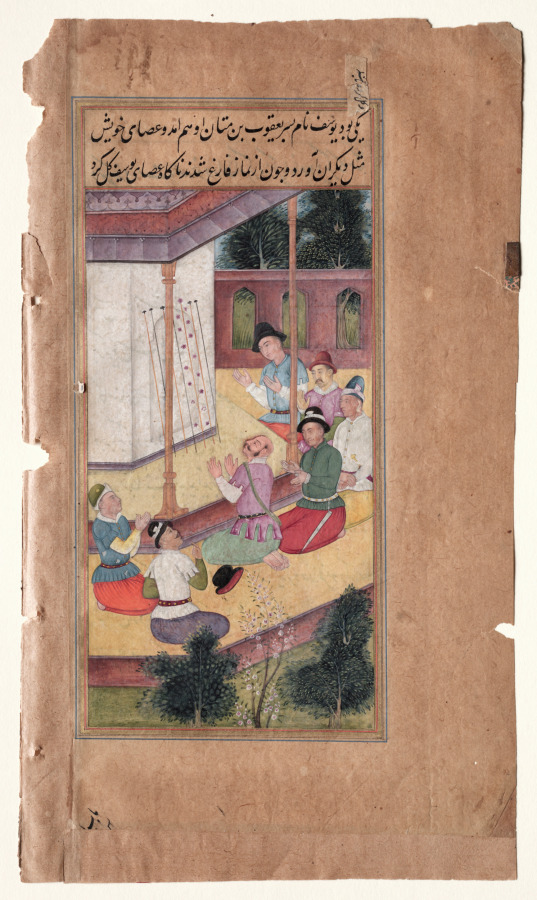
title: The Flowering of Joseph’s Rod (folio 11 verso), from a Mirror of Holiness (Mir’at al-quds) of Father Jerome Xavier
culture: Mughal India, Allahabad, made for Prince Salim (1569–1627)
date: 1602–04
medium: Gum tempera, ink, and gold on paper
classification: Manuscript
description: Joseph kneels outside the temple, among, according to the text, a group of unmarried men. The artist has depicted them dressed like contemporary Portuguese merchants wearing button-down belted shirts. The men had been ordered by God to bring their staffs to the temple; the one whose staff blossoms would become the husband of Mary. Joseph quivers with astonishment as his staff blooms; his hat falls to the ground as though it suddenly came off his head in surprise. Father Jerome’s source for this episode was the apocryphal Gospel of Pseudo-Matthew.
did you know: The suitors in this scene are dressed as contemporary Portuguese men, but have followed the Muslim practice of removing their shoes while in the temple.